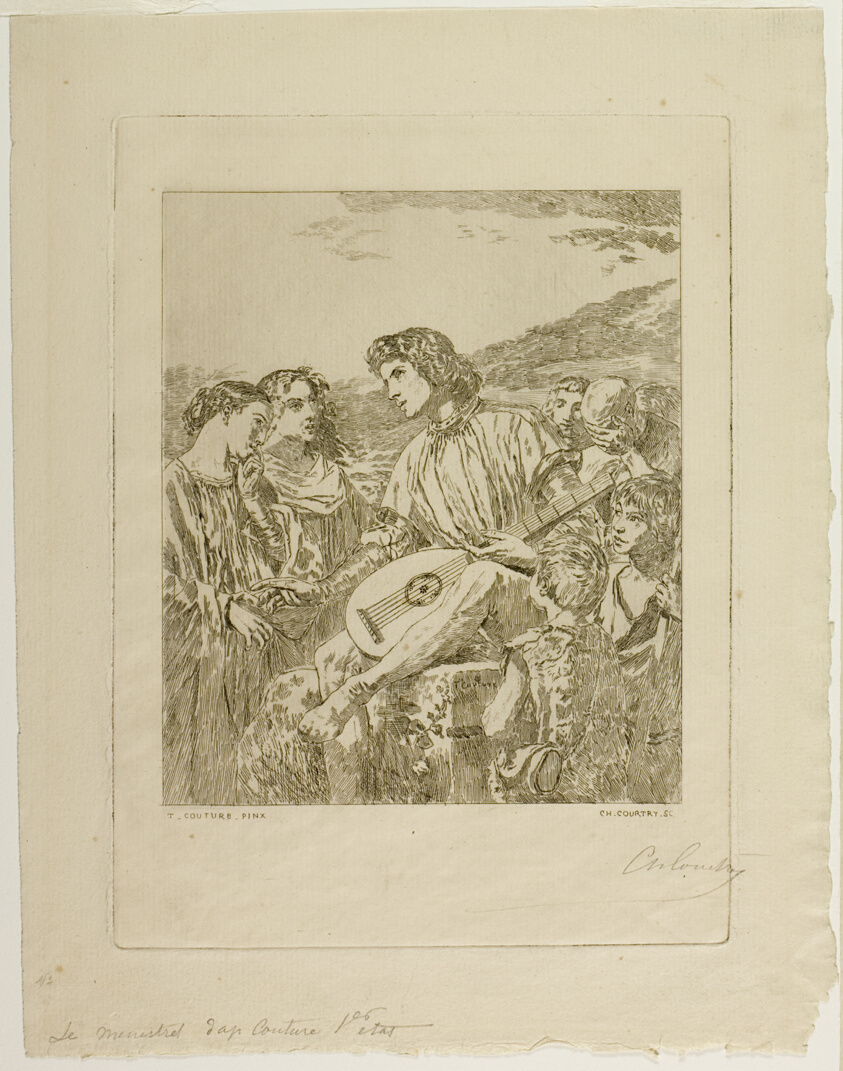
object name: Print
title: The Minstrel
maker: Charles Jean Louis Courtry (French, 1846-1897); after Thomas Couture (French, 1815-1879)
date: 1873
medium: Etching on paper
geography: France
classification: etching; print; prints and drawing